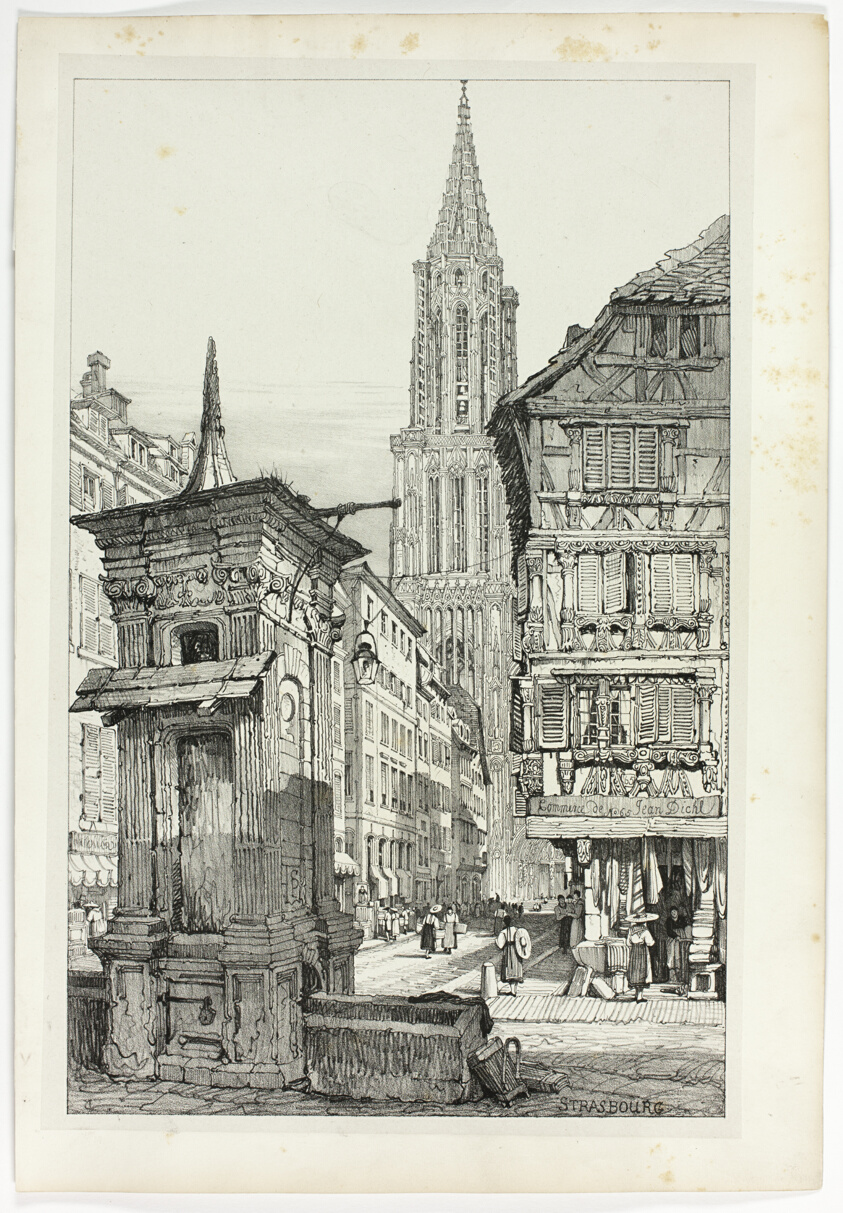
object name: Print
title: Strasbourg, from Facsimiles of Sketches made in Flanders and Germany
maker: Samuel Prout (English, 1783-1852); printed by Charles Joseph Hullmandel (English, 1789-1850)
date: 1833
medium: Lithograph in black on grayish-ivory chine, laid down on ivory wove paper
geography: England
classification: lithograph; print; prints and drawing